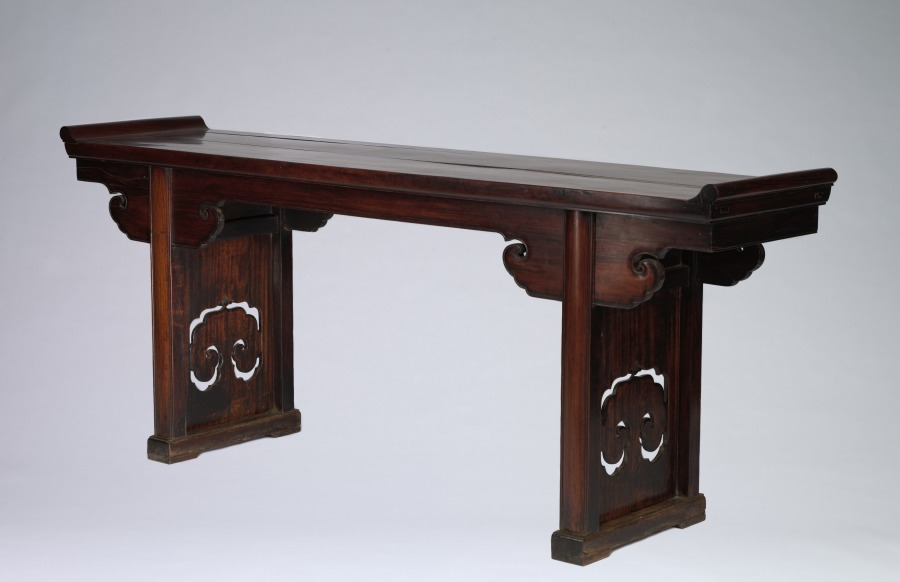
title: Side Table with Everted Ends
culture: China, Ming dynasty (1368–1644)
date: late 1500s–1600s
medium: redwood veneer and camphor wood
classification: Furniture and woodwork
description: Classic Chinese furniture is an art of carpentry and joinery, which makes use of a mortise-and-tenon framework. Design and craftsmanship, coupled with the organic material of the hardwood, create endless aesthetic possibilities. This side table is beautifully carved with cloud-collar spandrels on the aprons as well as openwork panels with cloud-collar patterns inset between the legs and the feet. The table has a narrow top in proportion to its length and bears the detail of the upturned ends that makes it more formal, and possibly used as an altar table.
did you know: Camphor wood is excellent for furniture making because of its attractive wood grain patterns and its distinctive scent that repels insects.